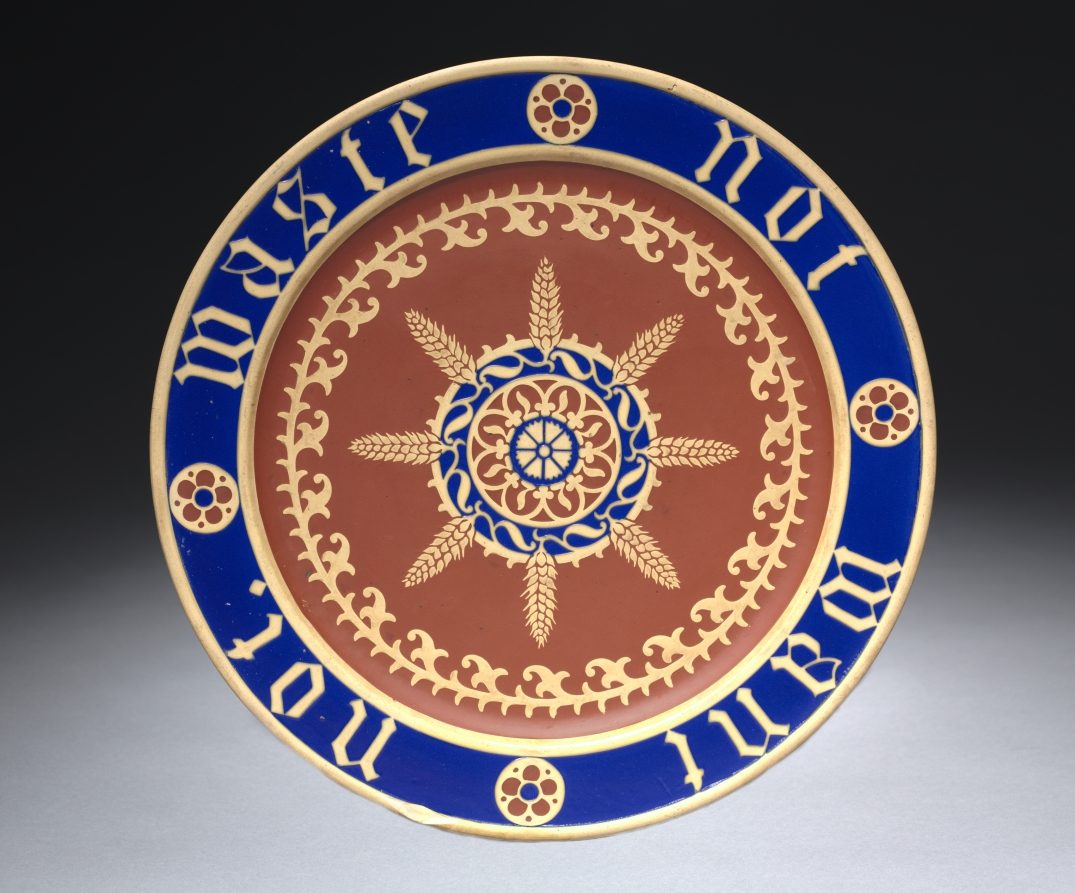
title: Bread Plate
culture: England, 19th century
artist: Augustus Welby Northmore Pugin (British, 1812–1852)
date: c. 1850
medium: stoneware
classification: Ceramic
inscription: around the perimeter of the plate "Waste Not Want Not"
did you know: This English architect, designer, artist, and critic who made this is remembered for pioneering the Gothic Revival style of architecture.